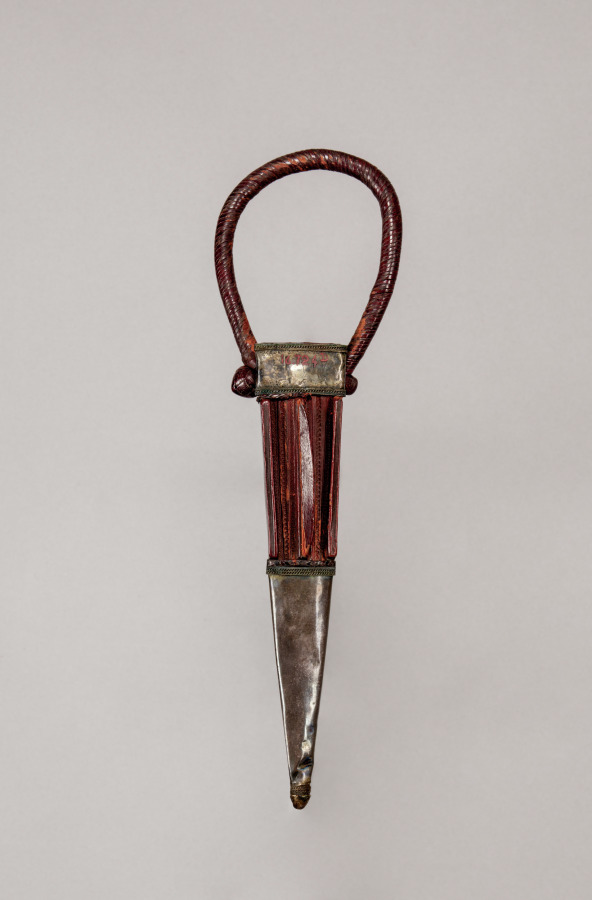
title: Scabbard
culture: Africa, East Africa, Sudan, unknown maker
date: 1880–1910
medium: metal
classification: Arms and Armor